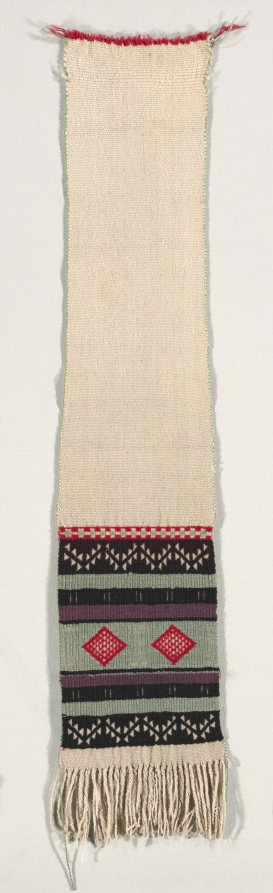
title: "Hopi Brocade" Style Dance Sash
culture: America, Native North American, Southwest, Pueblo (Hopi), Post-Contact, Transitional Period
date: c. 1880–1900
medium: plain weave with supplementary weft wrap; wool (homespun and Germantown)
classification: Textile